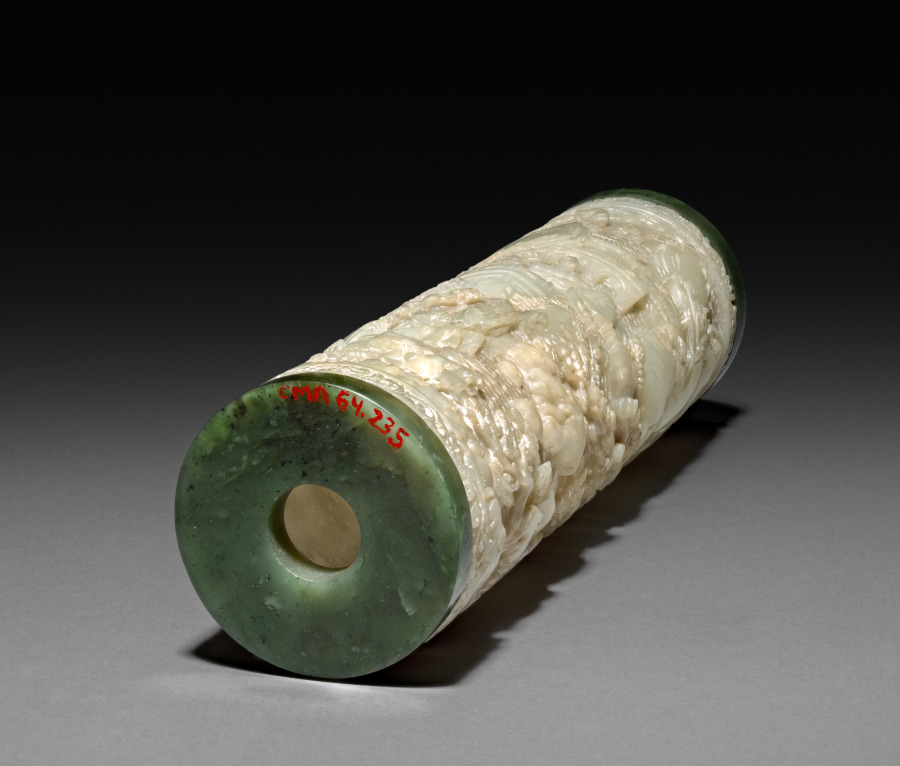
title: Cylinder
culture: China, Qing dynasty (1644-1911) or Republican period (1912-49)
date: 1800–1940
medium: jade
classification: Jade